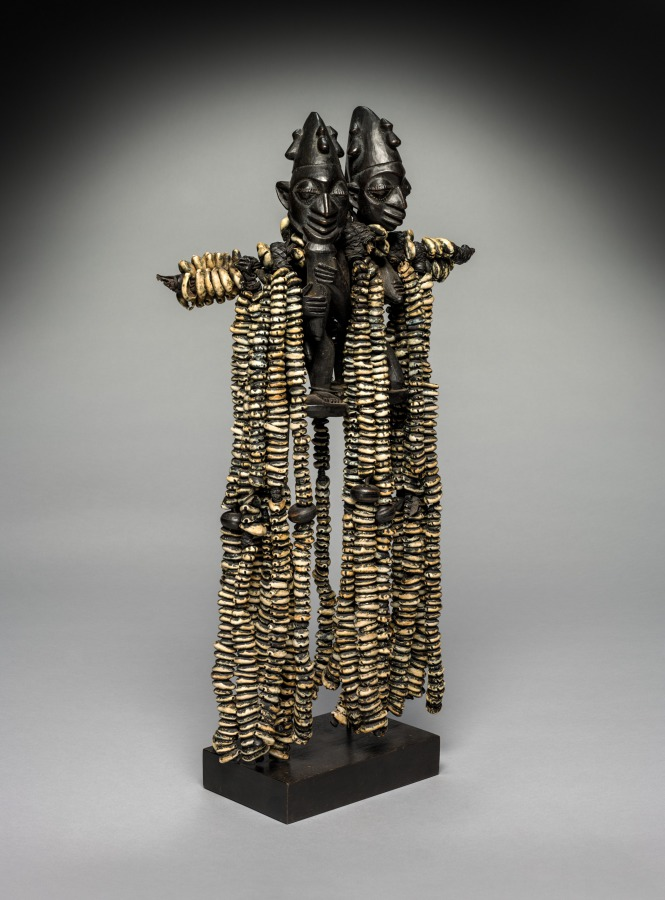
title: Dance staff for Èṣù (Ògò Èlẹ́gba)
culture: Africa, West Africa, Nigeria, Yorùbá-style maker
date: 1800s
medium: Wood, leather, cowrie shells, seeds, and natural fiber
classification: Sculpture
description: Èṣù (also called Èḷégba) embodies the most complex deity in the Yorùbá pantheon of gods. The messenger of the Yorùbá gods, Èṣù is also the bearer of sacrifices, guardian of the ritual way of life, and is associated with highly significant places including crossroads, markets, and home entrances. As seen here, Èṣù's power is often visually represented in Ògò Èḷégba (dance staffs); in this example, the unusually paired man and woman reference his ability to switch between the two genders, turn death into life (through childbirth), and to overcome the tension between the sexes. The male character bears a ritual flute reserved for this god. The abundance of cowrie shells means that Èṣù brings wealth.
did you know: If Eshu isn’t properly honored, trouble may befall the community or individual.